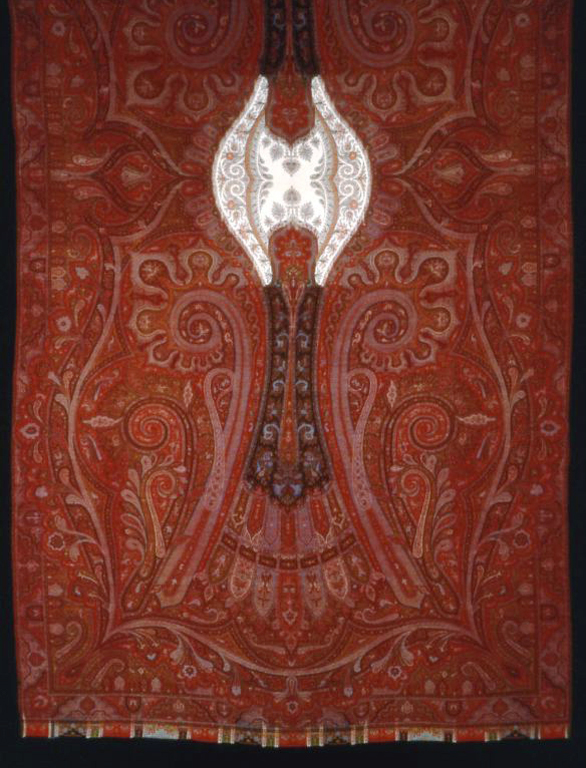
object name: Textile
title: Long Shawl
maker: France or Scotland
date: 1850/55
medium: Wool and silk, warp threads dyed in multiple colors prior to weaving; center of weft-float faced 1:3 'Z' twill weave; patterned areas of weft-float faced 1:3 twill weave with supplementary patterning wefts bound in weft-float faced 1:3 'Z' twill interlacings over warp-float faced twill weave; "Harlequin" tabs of wool, silk, and cotton, warp-float faced 3:1 'Z' twill weave with supplementary patterning wefts bound in weft-float faced 1:3 'Z' twill interlacings; knotted warp fringet; woven on loom with Jacquard attachment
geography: Scotland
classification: textile; weaving